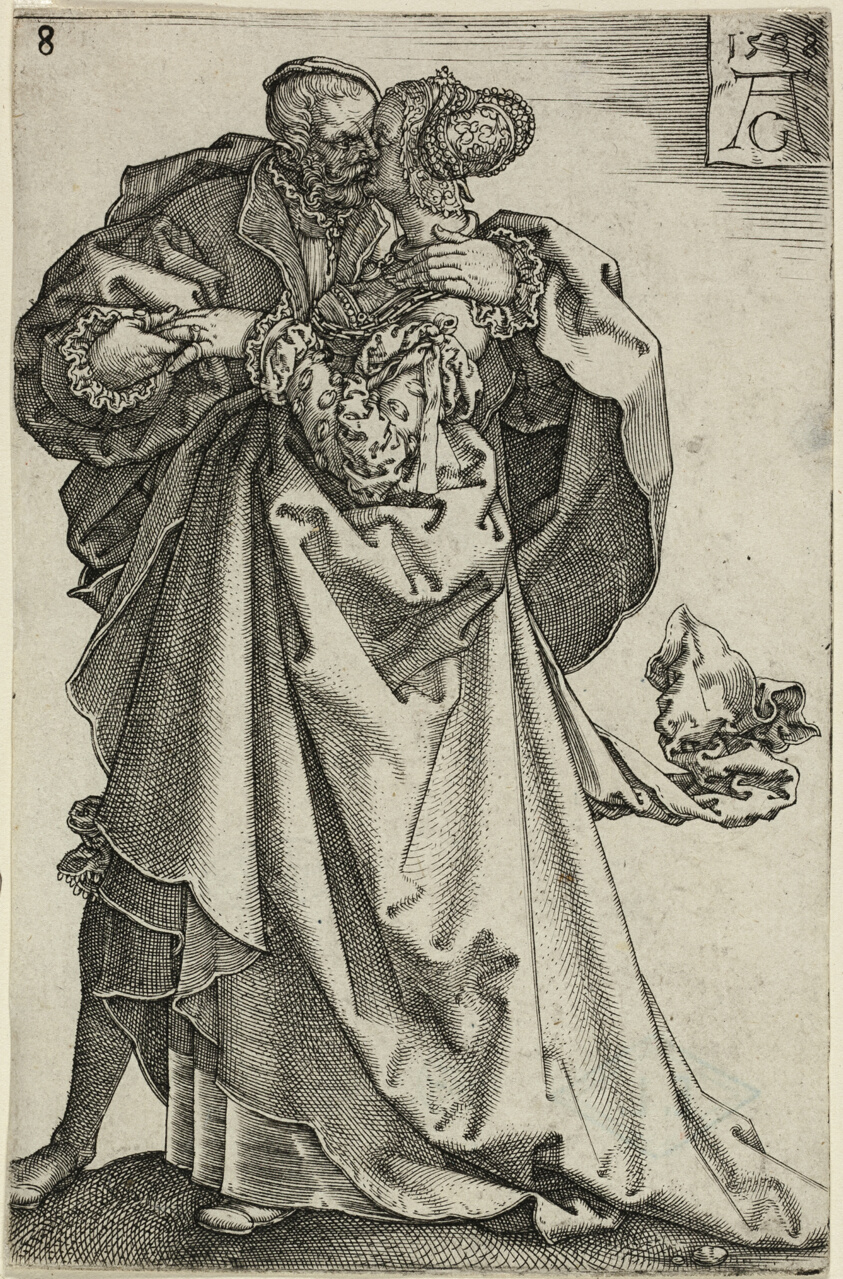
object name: Print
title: Dancing Couple, plate eight from The Large Wedding-Dancers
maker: Heinrich Aldegrever (German, 1502-c.1560)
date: 1538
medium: Engraving in black on ivory laid paper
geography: Germany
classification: engraving; print; prints and drawing